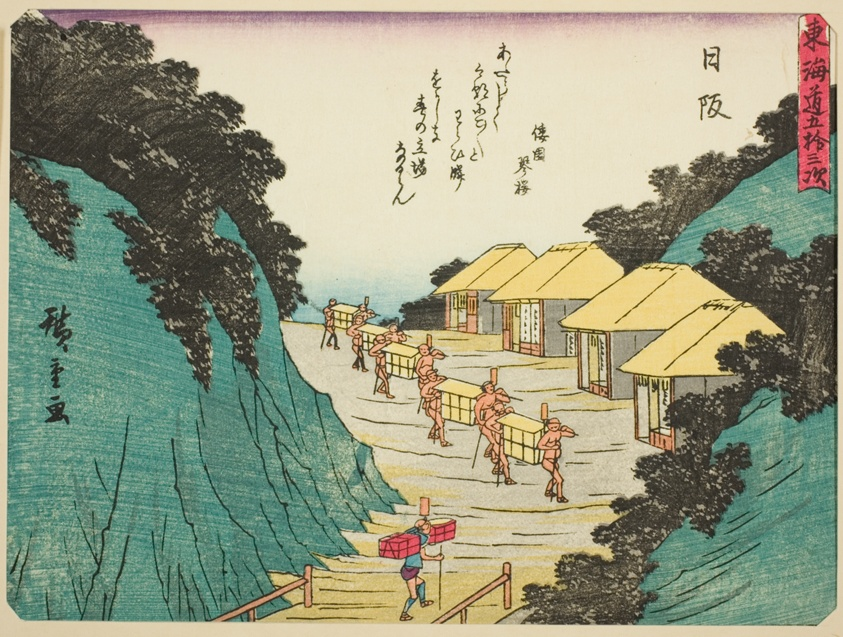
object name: Print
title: Nissaka, from the series "Fifty-three Stations of the Tokaido (Tokaido gojusan tsugi)," also known as the Tokaido with Poem (Kyoka iri Tokaido)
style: Japanese (culture or style)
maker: Utagawa Hiroshige 歌川 広重; Japanese, 1797-1858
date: c. 1837/42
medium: Color woodblock print; chuban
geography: Japan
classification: woodblock print; print; asian art